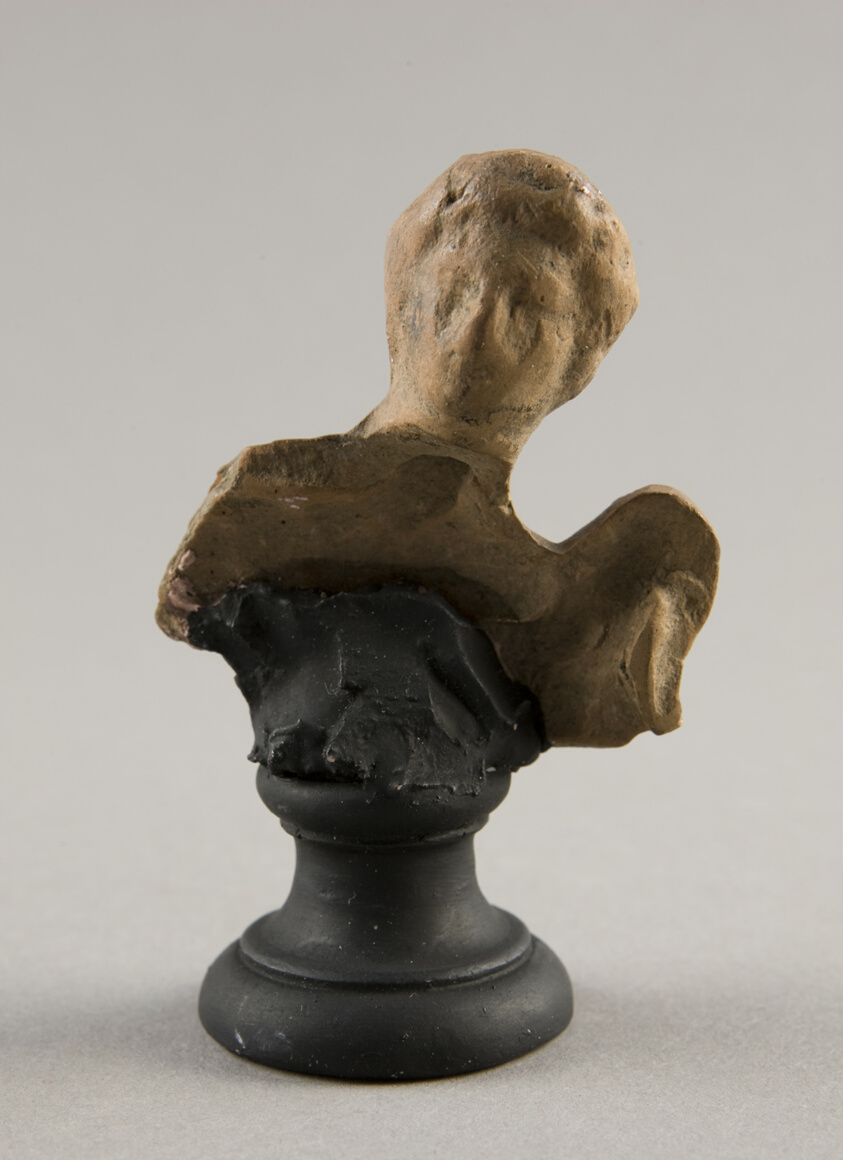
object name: Sculpture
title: Head of a Man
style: greek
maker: Greek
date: 3rd-2nd century BCE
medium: terracotta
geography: Greece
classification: earthenware; ceramics; sculpture; ancient art